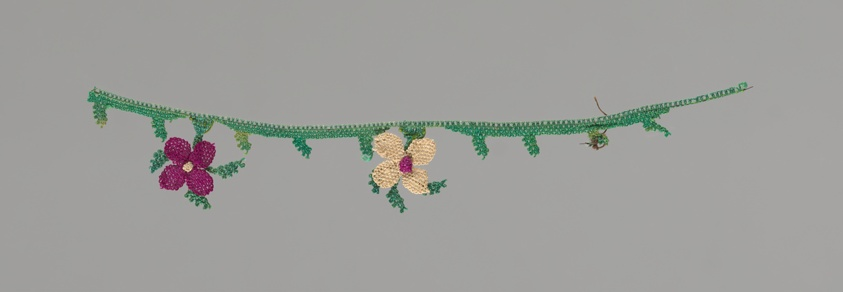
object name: Textile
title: Edging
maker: Eastern Mediterranean, probably Cyprus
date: 1875/1900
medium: Silk and horsehair, needle lace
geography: Eastern Mediterranean Region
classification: textile; lace - needle